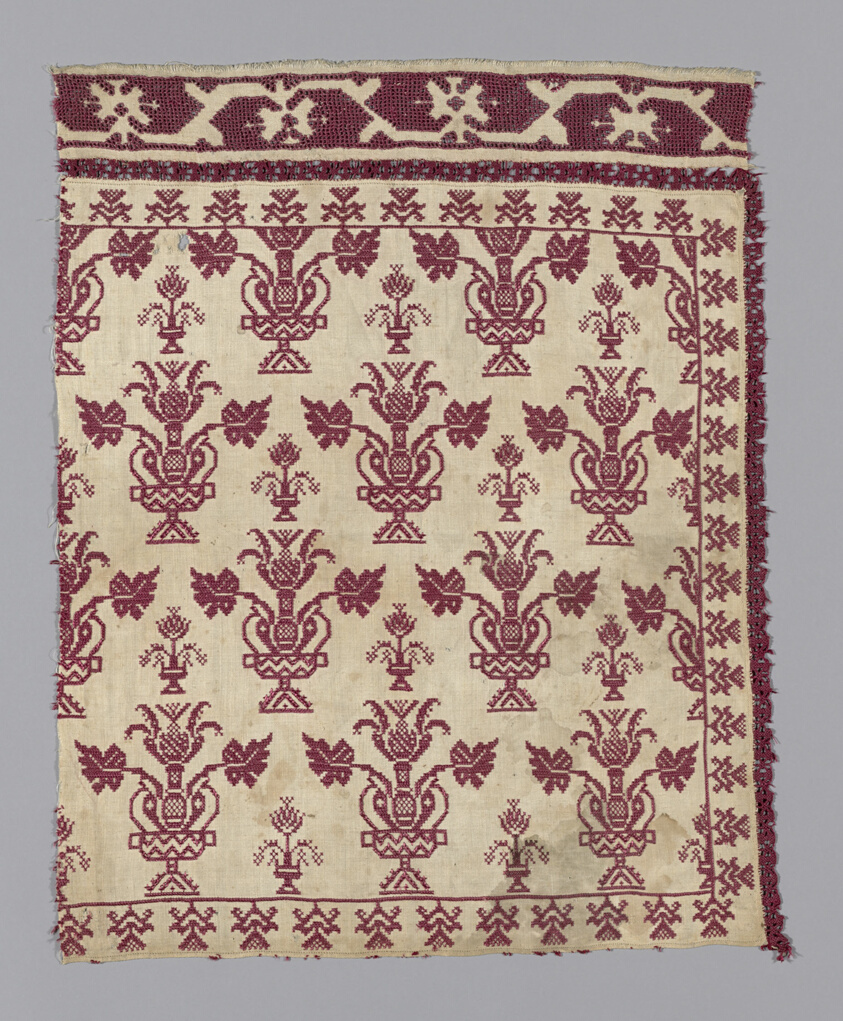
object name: Textile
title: Pillow Cover (Incomplete)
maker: Italy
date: 1601/50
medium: Linen, plain weave; embroidered with silk in cross and long armed cross stitches; upper border of linen, plain weave; cut and drawn thread work; embroidered with silk in Russian overcast stitches; insertion of silk, needle lace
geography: Italy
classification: textile; needlework (visual works)